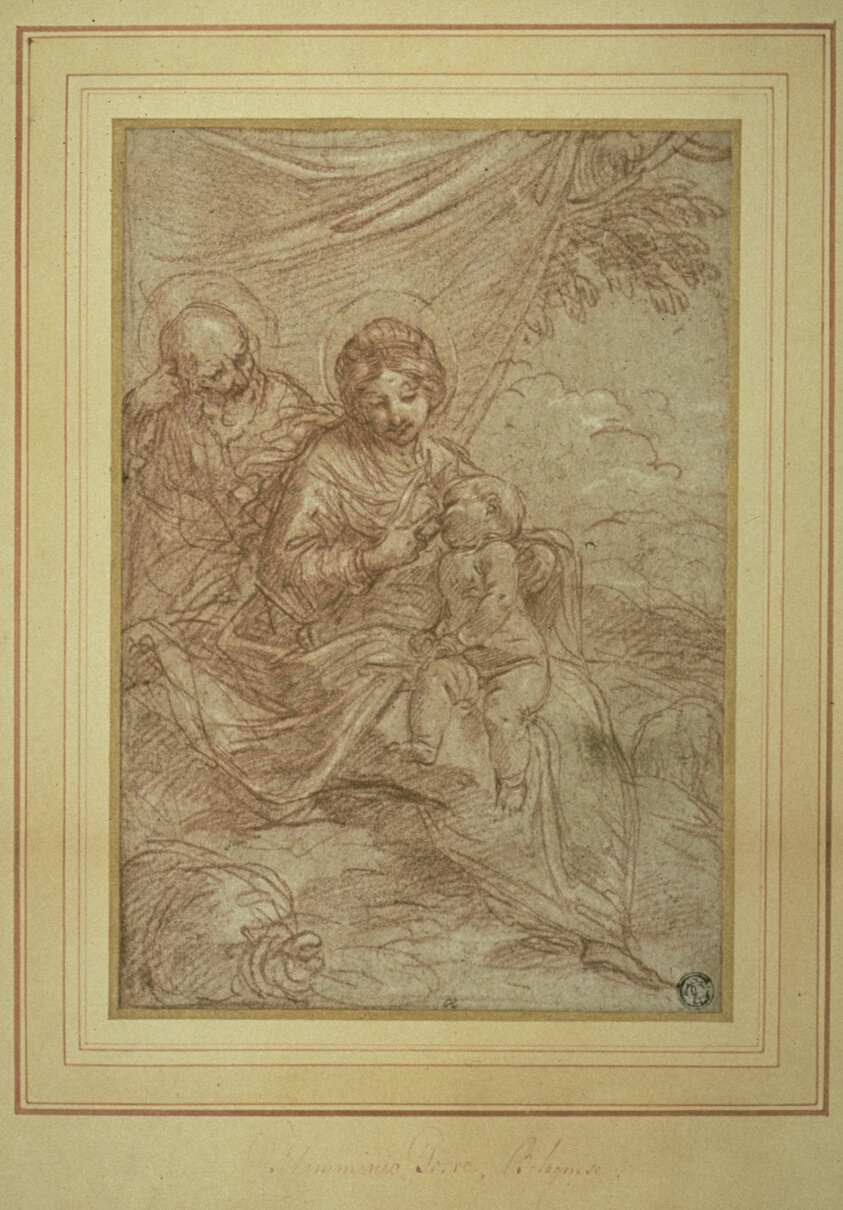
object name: Drawing and Watercolor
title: Rest on the Flight into Egypt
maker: Flaminio Torre (Italian, 1621-1661)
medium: Red chalk, heightened with touches of white chalk, on pale grayish-brown laid paper, with blue fibers, laid down on tan laid card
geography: Italy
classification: drawings (visual works); prints and drawing